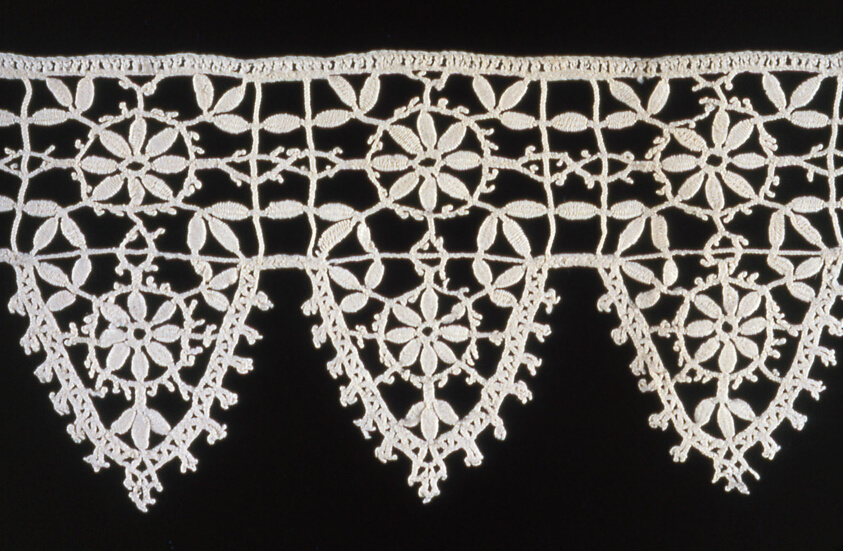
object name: Textile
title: Border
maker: Italy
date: 1601/25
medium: Cotton, bobbin straight-lace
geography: Italy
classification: textile; lace - bobbin